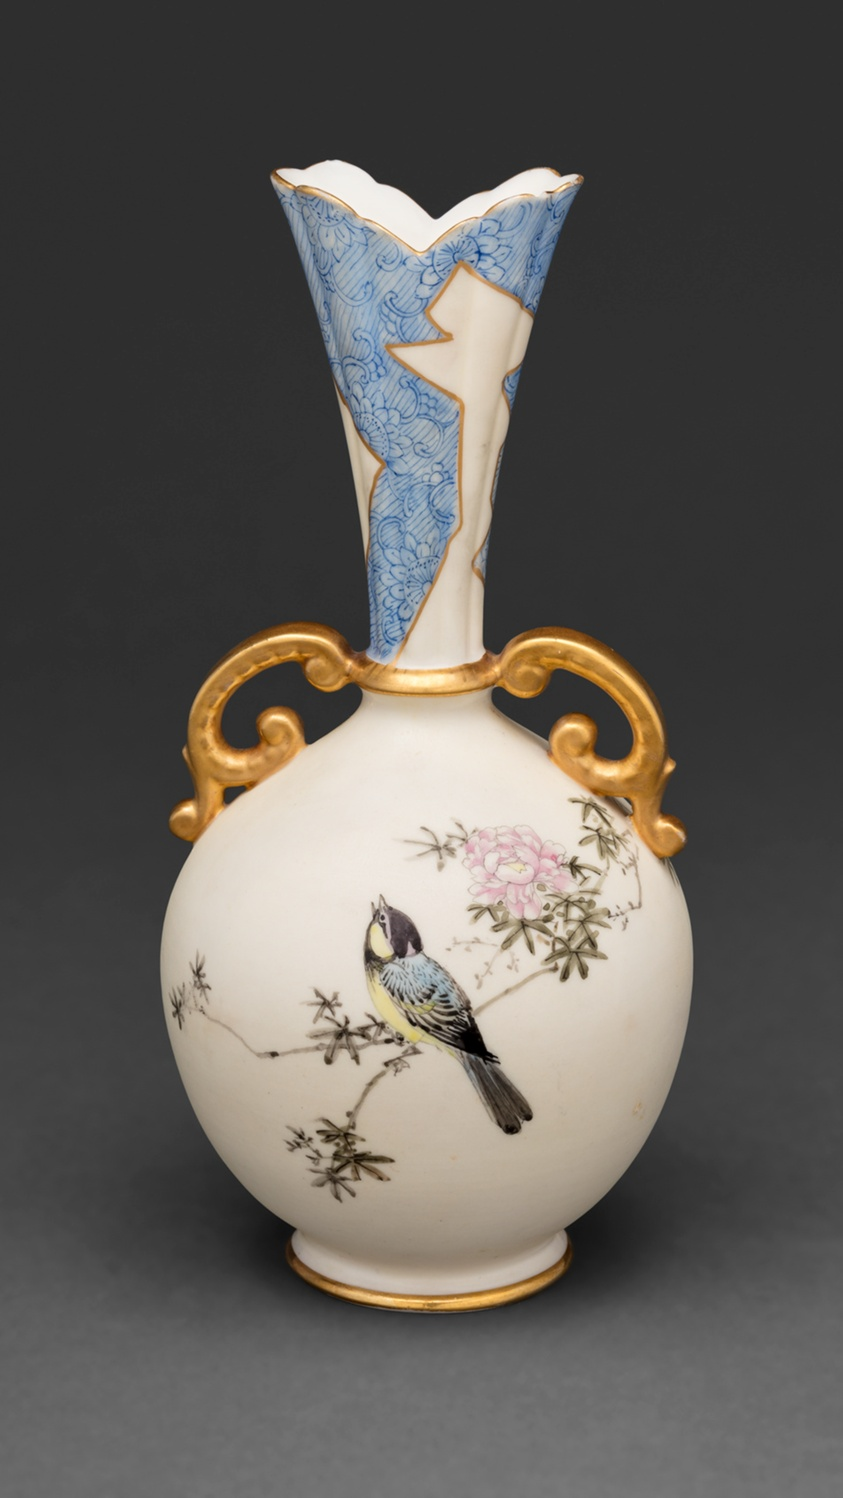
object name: Ceramics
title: Vase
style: Aesthetic Movement, 19th century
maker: Ceramic Art Company; American, 1889–1906; Trenton, New Jersey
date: 1894–96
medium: Porcelain with overglaze material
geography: Trenton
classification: ceramics; american decorative arts; art of the americas; decorative arts; porcelain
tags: birds